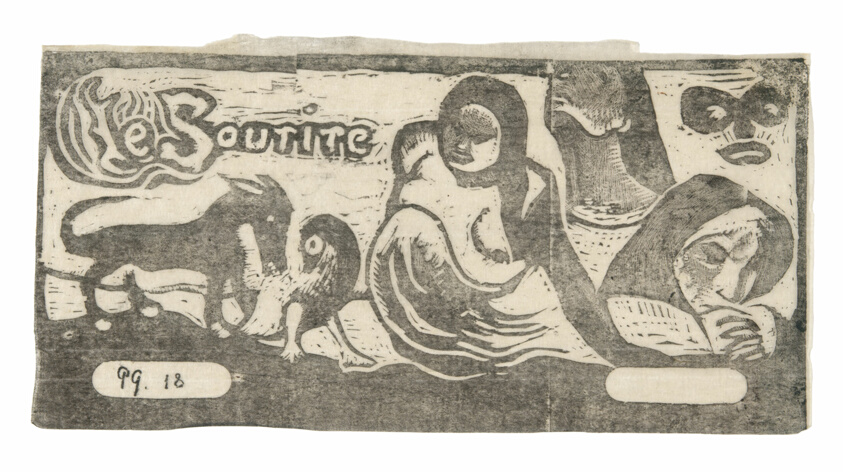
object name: Print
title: Three People, a Mask, a Fox, and a Bird, headpiece for Le sourire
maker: Paul Gauguin (French, 1848-1903)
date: 1899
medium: Wood-block print in black ink on thin ivory laid Japanese paper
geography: France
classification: woodcut; print; prints and drawing